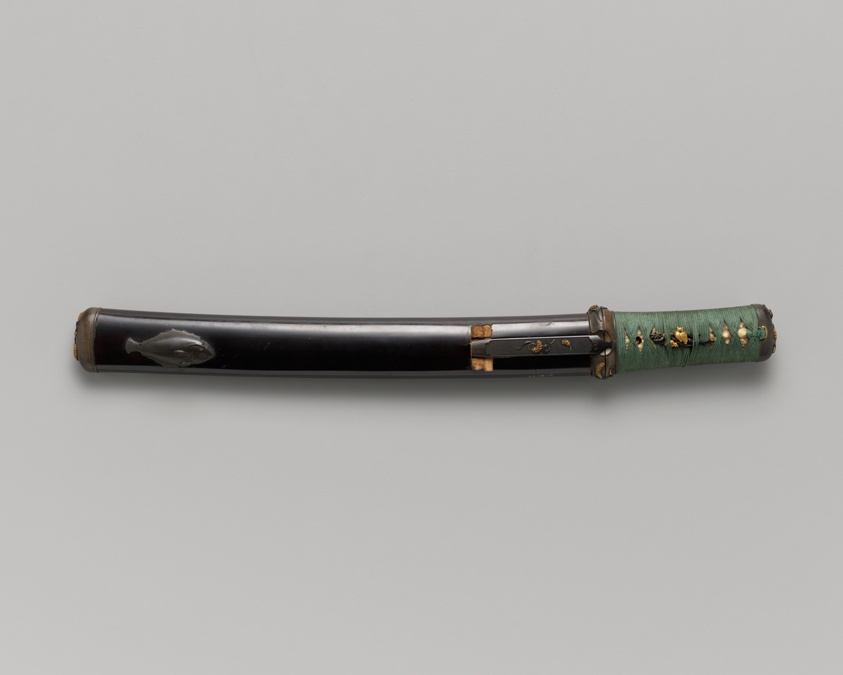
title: Dagger (Tanto)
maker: Fujiwara Teruhiro ((Japanese, 17th century))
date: 17th century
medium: Steel, wood, lacquer, ray skin (karagi), gold, and copper-gold alloy (shakudo)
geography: Japan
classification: metal; weapon; asian art